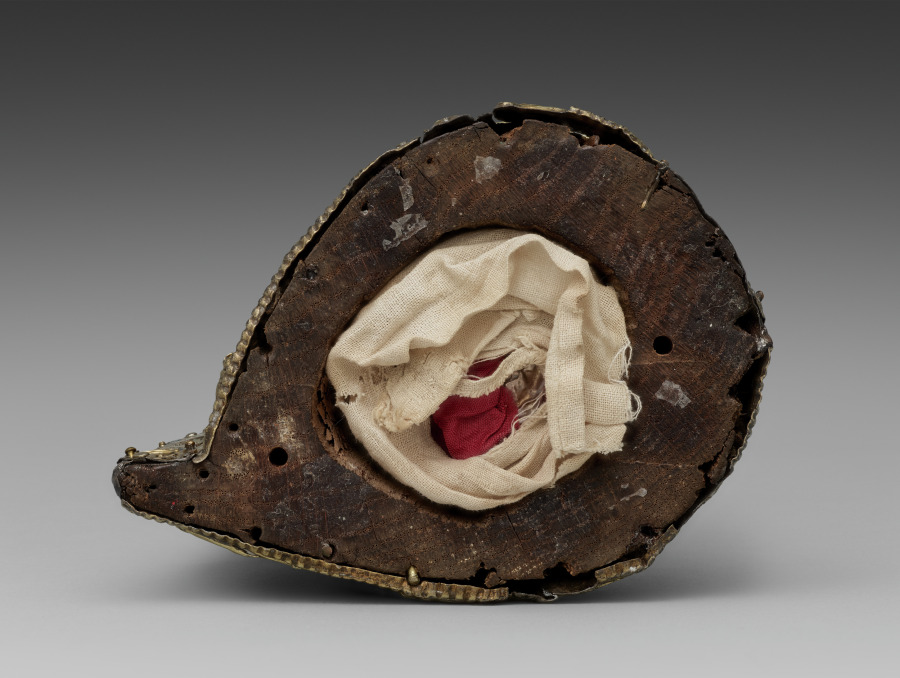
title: Arm Reliquary of the Apostles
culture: Germany, Lower Saxony, Hildesheim, Romanesque period, late 12th century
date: c. 1190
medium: gilt silver, champlevé enamel, oak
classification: Metalwork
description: Taking the form of a clothed lower arm with an outstretched hand, this reliquary from the Guelph Treasure appropriately enshrines a piece of an unidentified saint’s arm bone. Arm reliquaries like this one served as liturgical props; during religious services and processions, the clergy used them to bless and touch the faithful, thus making the presence of the saint more palpable and immediate. The apostle busts that decorate this arm reliquary seem to indicate that the relic it contains is that of an apostle. Duke Henry the Lion, a major patron of the church of Saint Blaise, is known to have received such relics from the Byzantine emperor Manuel I (1143-1180) upon his return from a pilgrimage to Jerusalem.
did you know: Reliquaries were prized not for the opulence that you see, but for the items that they held. They enshrined items associated with saints, like a piece of clothing they wore or a small portion of their remains. In this case, an arm bone is encased within.